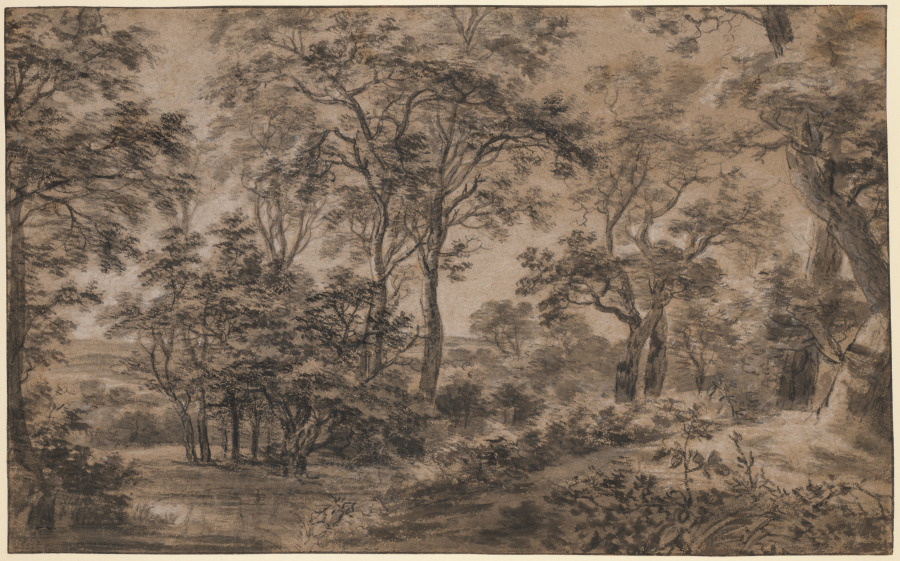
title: Wooded Landscape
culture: Netherlands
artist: Anthonie Waterloo (Dutch, 1609/10–1690)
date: after 1648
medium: Charcoal applied wet, brush and black and brown and white washes; black ink framing line on antique brown laid paper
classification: Drawing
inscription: On verso, pen or graphite inscription (erased?) A. Pynnier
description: Known exclusively for his drawings and prints, the Dutch artist Anthonie Waterloo specialized in tree studies and dense forest scenes such as this drawing. Here he created a vista through groupings of tall trees, producing the effect of shimmering light and movement with his unique technique of using wet charcoal over dry chalk. He added a subtle white wash throughout the center of the composition to create the hint of the sun’s glow beyond the trees. Such a work would have been sold as a finished work of art.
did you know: Studies of dense forests and individual trees were a specialty of Dutch artists in the 1600s.